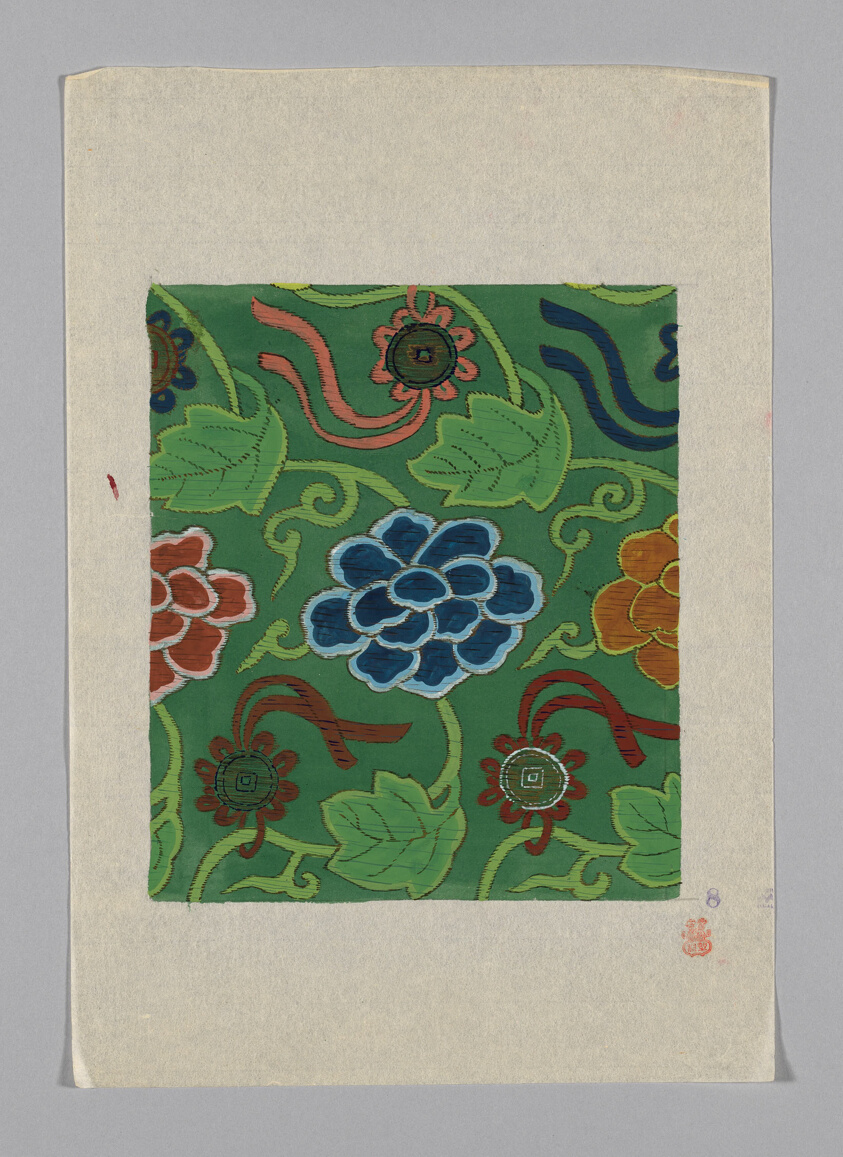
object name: Drawing and Watercolor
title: Design on Paper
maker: Japan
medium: Paper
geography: Japan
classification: textile; accessory - paper design; paper; watercolor